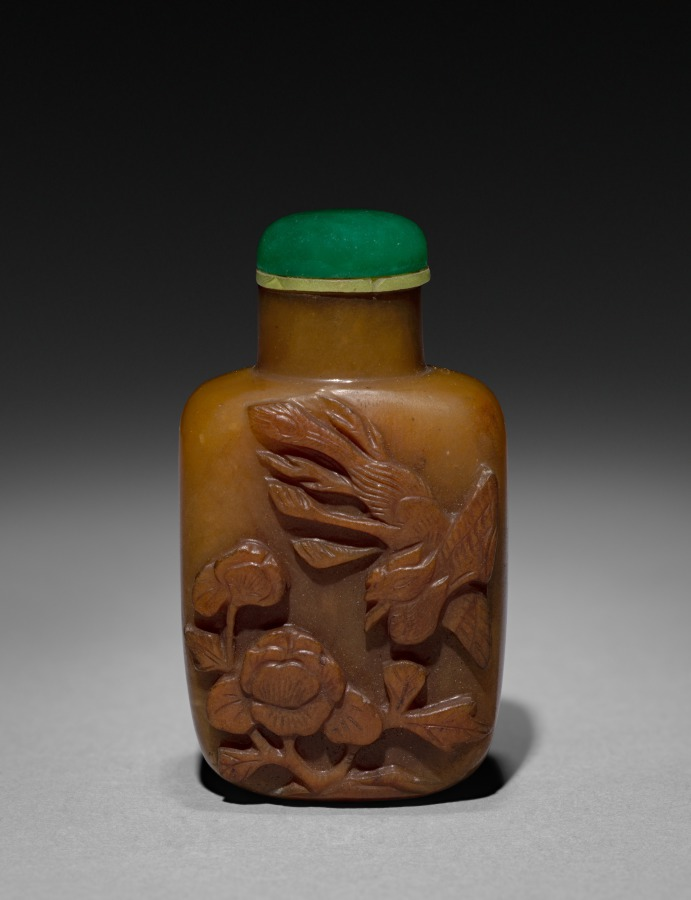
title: Snuff Bottle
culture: China, Qing dynasty (1644-1911)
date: 1644–1911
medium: glass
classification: Glass